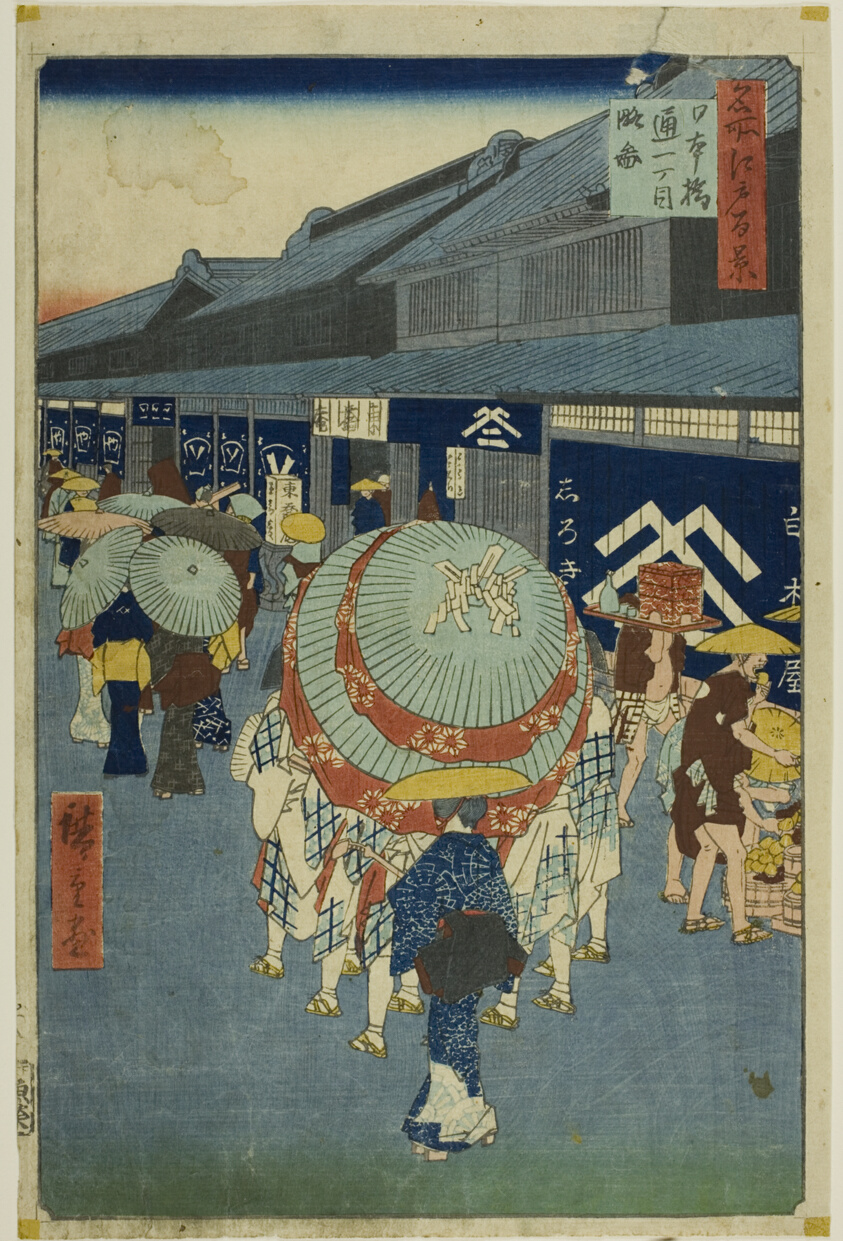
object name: Print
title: View of Nihonbashi Tori-itchome (Nihonbashi Tori-itchome ryakuzu), from the series " One Hundred Famous Views of Edo (Meisho Edo hyakkei)"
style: Japanese (culture or style)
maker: Utagawa Hiroshige 歌川 広重; Japanese, 1797–1858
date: 1858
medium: Color woodblock print; oban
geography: Japan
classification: woodblock print; print